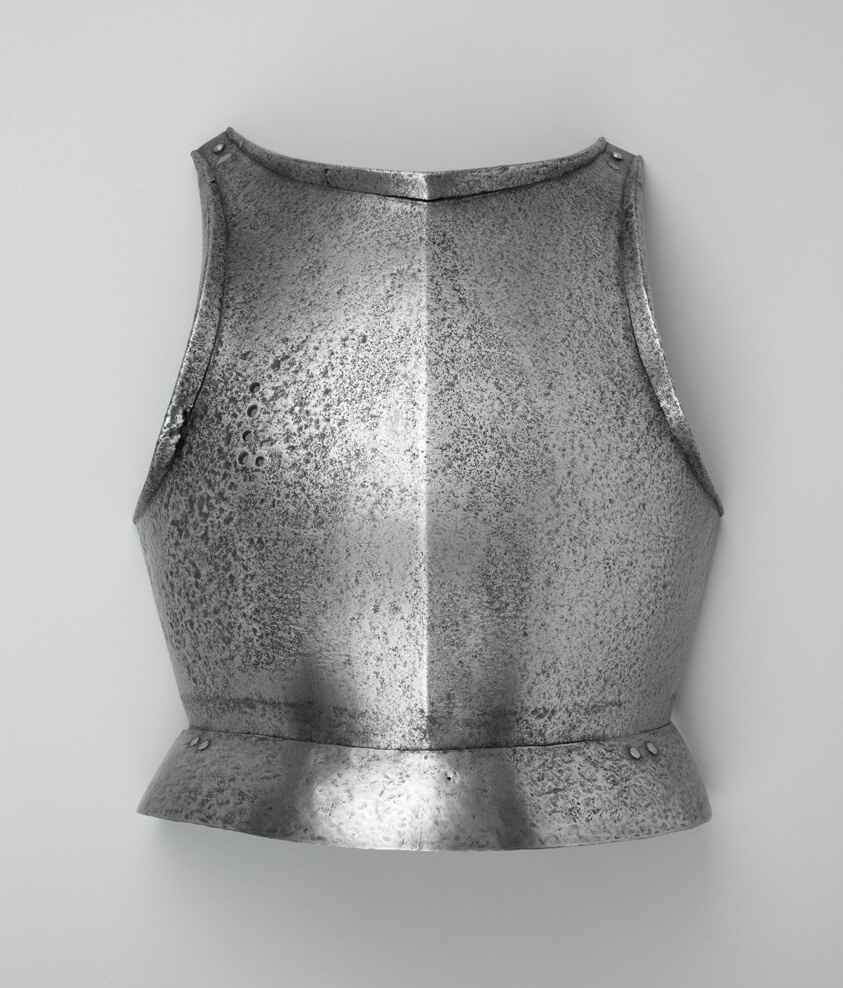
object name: Armor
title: Breastplate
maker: Spanish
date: c. 1500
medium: Steel and leather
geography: Spain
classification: suit-element; armor; arms and armor